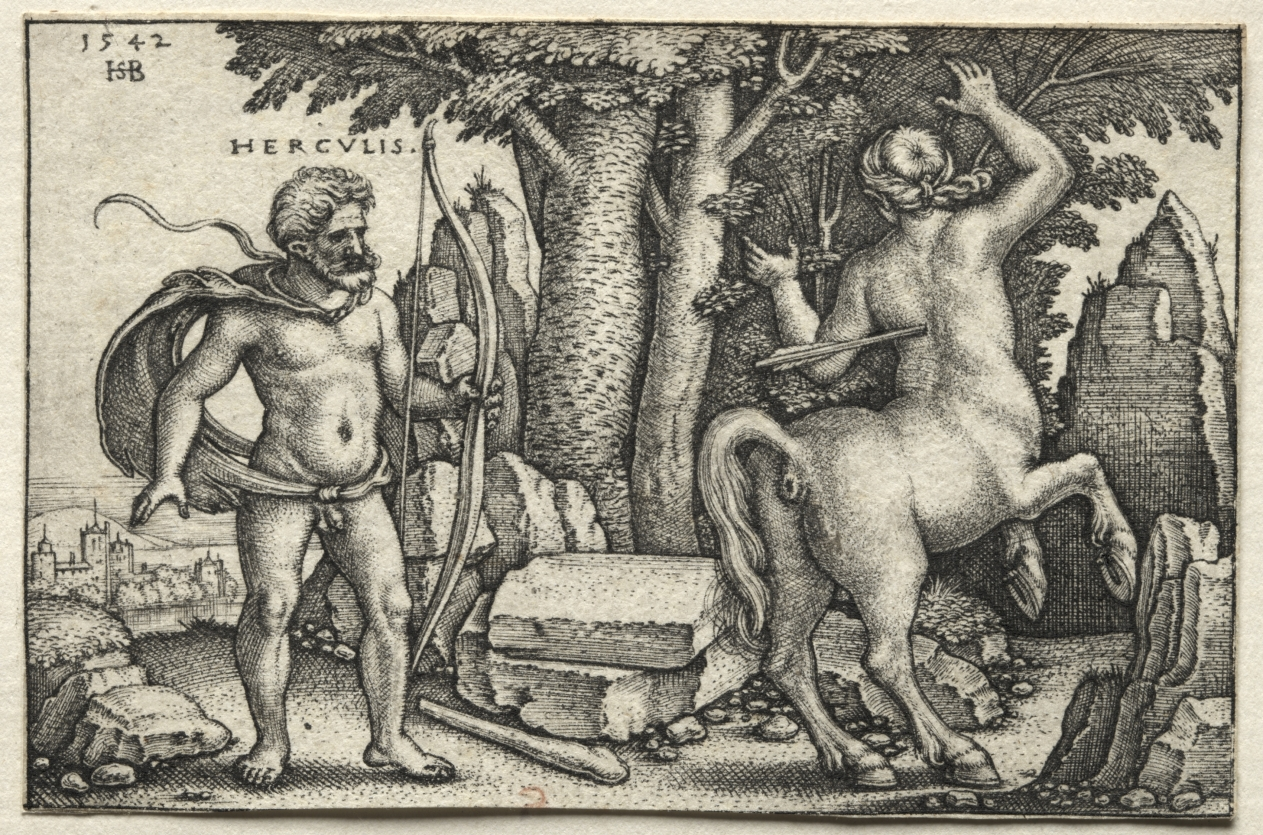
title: The Labors of Hercules: Hercules Shooting Nessus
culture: Germany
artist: Hans Sebald Beham (German, 1500–1550)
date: 1542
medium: engraving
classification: Print